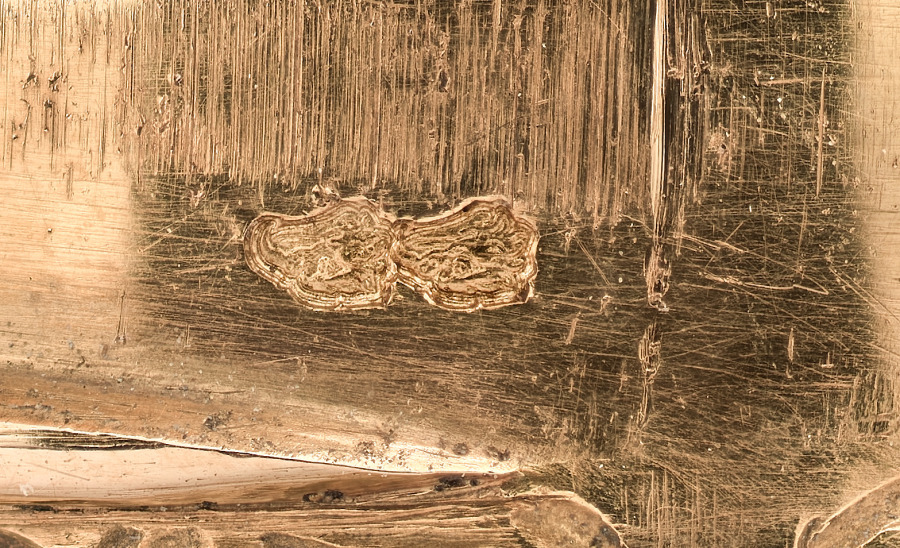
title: Gold Box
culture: France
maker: Juste-Aurèle Meissonnier (French, 1695–1750)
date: 1728–29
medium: gold and lapis lazuli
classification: Metalwork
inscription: IOM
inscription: a crowned M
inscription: a crowned dolphin's head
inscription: a crowned chancellor's mace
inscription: double frame eagle's head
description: With its central cartouche, heavy molding, and fluted sides, the design of this box attests to Juste-Aurèle Meissonnier’s interest in architecture. The box is further distinguished by a strong sense of movement, achieved through its dynamic contour, extraordinary level of detail, and the dramatic contrast between gold and lapis lazuli. Such small boxes, known as snuffboxes, were used to hold scented powdered tobacco that was inhaled through the nostrils. Made of precious materials and highly ornamented, they conveyed the owner’s wealth, fashion awareness, sophistication, and social standing. These personal, collectible items were often presented as luxurious gifts. This box was made for the dowager Queen of Spain, Maria Anna of Neuburg, whose coat of arms – along with that of her late husband, Charles II – features on the cover.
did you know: This is one of the two known objects that bear the maker's mark of Meissonnier.